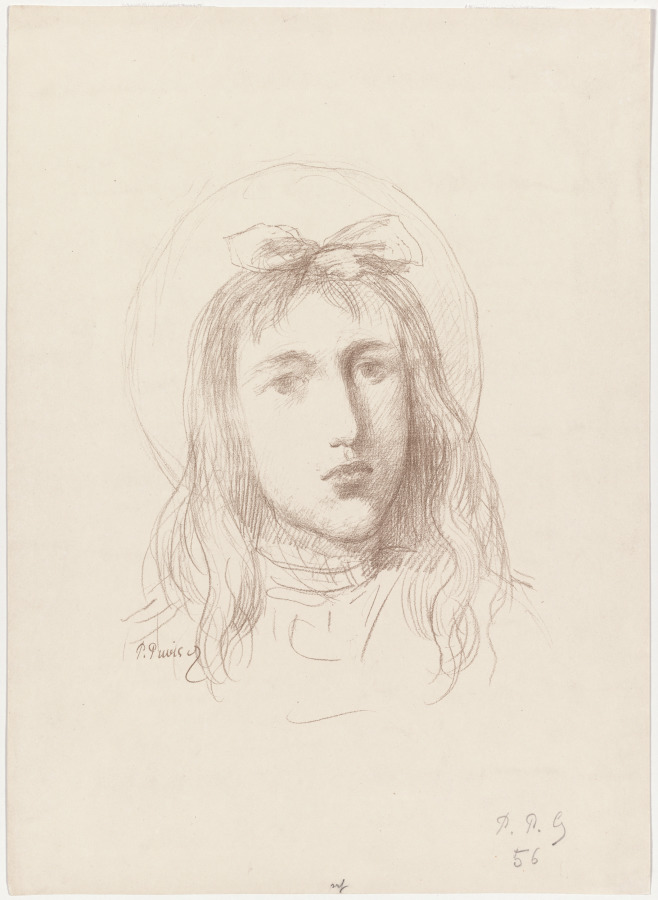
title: Tête de Jeune Fille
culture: France, 19th century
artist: Pierre Puvis de Chavannes (French, 1824–1898)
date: 1824– 1898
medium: lithograph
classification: Print